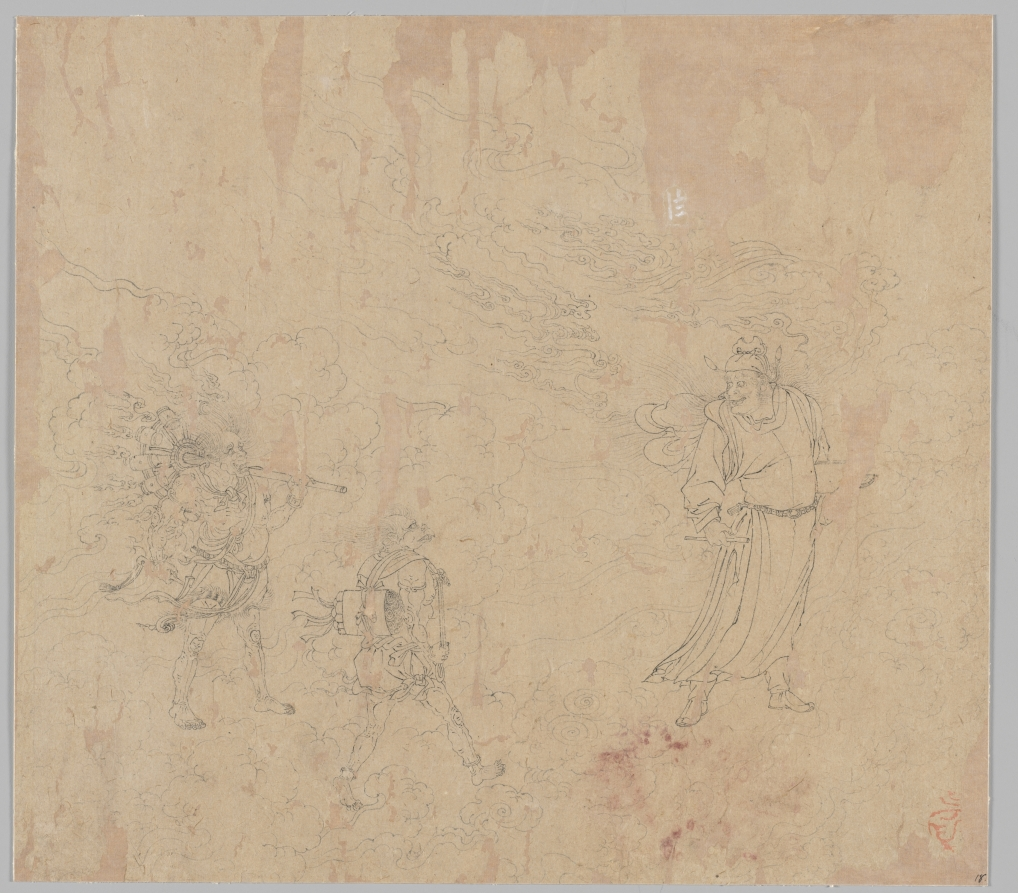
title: Album of Daoist and Buddhist Themes: Procession of Daoist Deities: Leaf 18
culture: China, Southern Song dynasty (1127-1279)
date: 1200s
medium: Album, ink on paper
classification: Painting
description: This leaf is part of an important album of 50 drawings encompassing three subjects: processions of Daoist deities to the celestial spheres, the Ten Kings of Hell, and Erlang’s Campaign to Rid Mount Guankou of Dangerous Beasts (soushan tu 搜山圖). In this section of the Daoist pantheon, Zhong Kui 鍾馗, the hero who fights demons, is portrayed with two ghost attendants. One holds a handle at the end of which is a large wheel with drums. Thunder, which drums can evoke, is a theme of many of the Daoist Pantheon leaves in this album.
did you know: Zhong Kui’s bird-faced attendant carries a load of scrolls on his back.